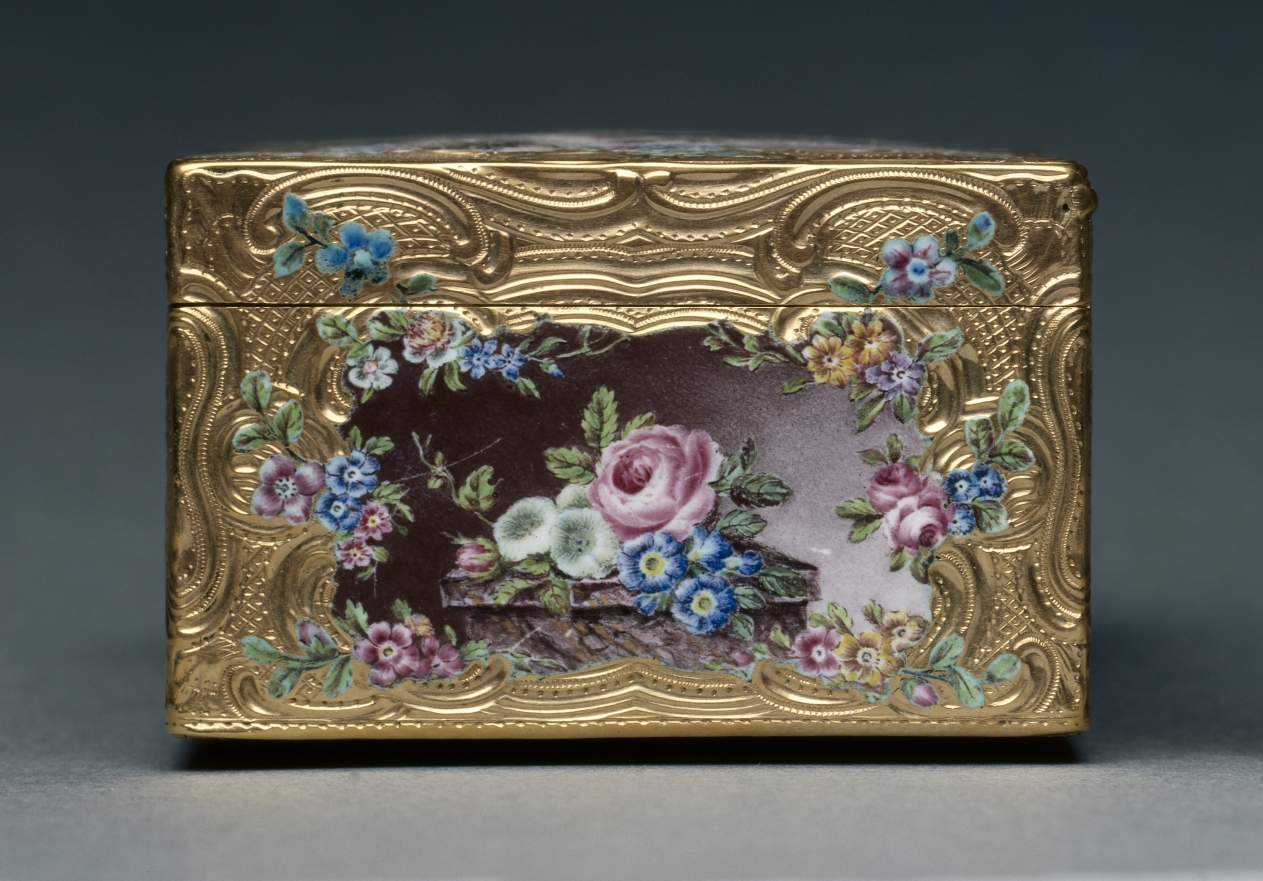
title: Snuff Box (Tabatière)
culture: France, 18th century (style of Louis XV)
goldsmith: Francois Guillaume Tiron (French)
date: 1756–57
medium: gold and enamel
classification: Miscellaneous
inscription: [Maker's mark of Francois-Guillaume Tiron, master goldsmith in 1747, inside cover; left wall]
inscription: [Warden's mark for Paris, 1756-1757, inside cover]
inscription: [Charge mark of Julien Berthe, Paris, 1750-1756, inside cover; left wall]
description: The miniature paintings that decorated snuff boxes were depicted in intricate detail requiring complex technical skill. This box’s miniatures are painted with enamel en plein, meaning the enamel has been applied directly to the metal of the box. A different enameling technique, basse-taille, is used to depict the doves and floral borders. Here, the gold has been chiseled away and filled with translucent enamel in order to produce a three-dimensional effect.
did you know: In the mid-1700s François-Guillaume Tiron worked alongside his brother, Jean-Marie Tiron, one of the most celebrated makers of gold boxes of the 18th century.